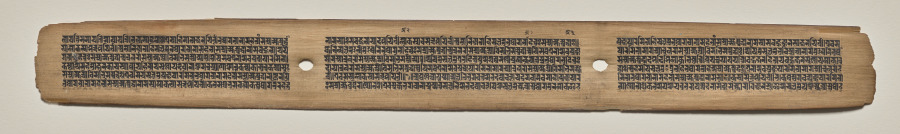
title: Text, folio 89 (recto), from a Manuscript of the Perfection of Wisdom in Eight Thousand Lines (Ashtasahasrika Prajnaparamita-sutra)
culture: Eastern India, Bihar, Vikramashila Monastery. Painting: Nepal, Kathmandu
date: Sunday, September 14, 1119 (year 239 of the Newar Samvat in the month of Ashvina)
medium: gum tempera and ink on palm leaf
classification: Painting